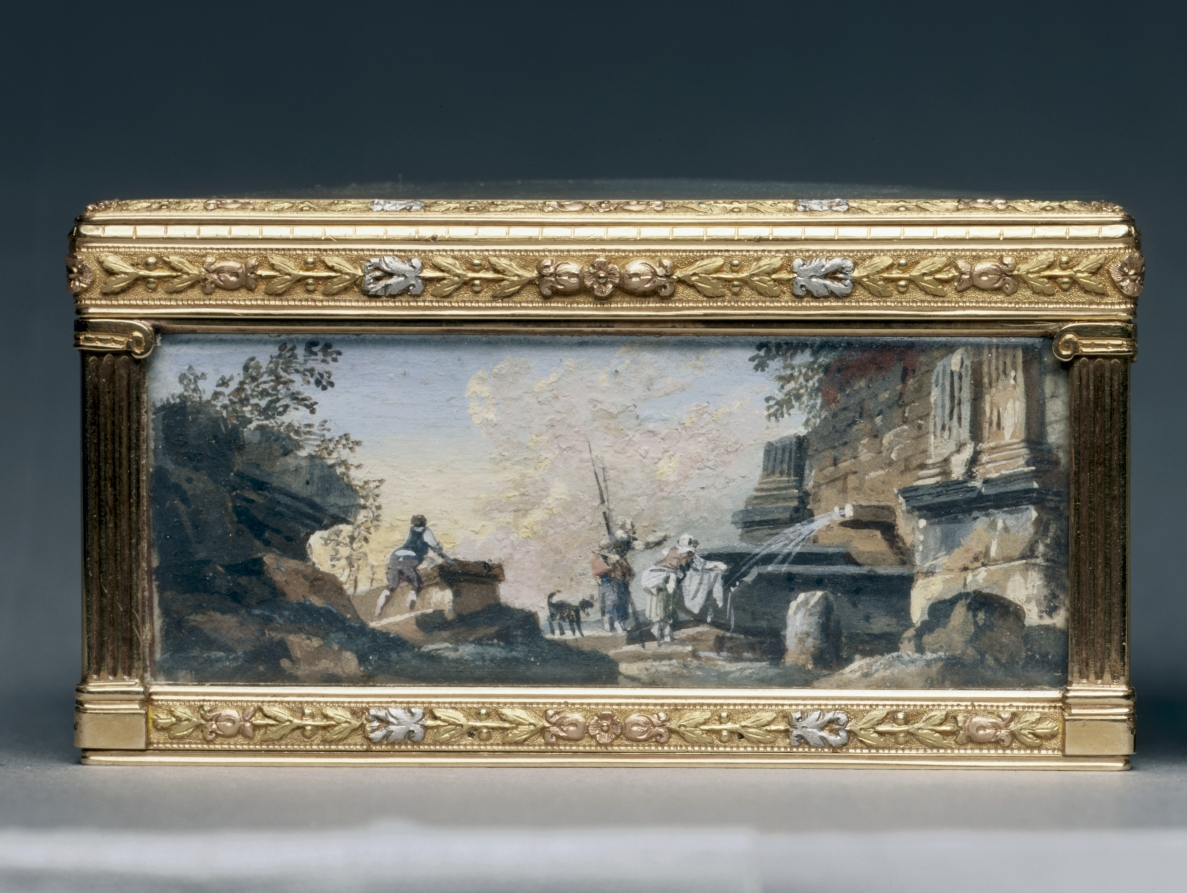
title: Rectangular Box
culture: France, 19th century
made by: Alexandre Leferre (French)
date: c. 1840–1850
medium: gouache miniatures mounted on gold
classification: Miscellaneous